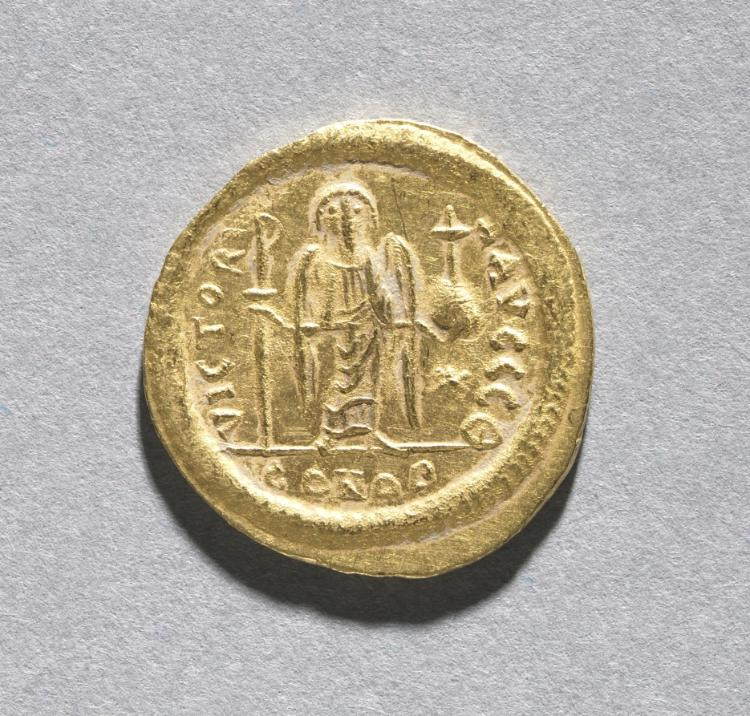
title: Solidus of Justinian I (reverse)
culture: Byzantium, Constantinople, Byzantine period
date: 545–565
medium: gold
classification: Coins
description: The vast number of surviving Byzantine coins attests to the level of trade across the empire. Controlled and supervised by the emperor, the producers of coins took care to represent his authority and reflect his stature. Talented artists were recruited to engrave the dies (molds) used for the striking of coins. Emperors increasingly came to include their heirs and co-emperors on their coinage, as well as other family members or even earlier rulers. Coins were recognized, then as now, as small, portable works of art. With their inscriptions and images, Byzantine coins provide valuable documentation of historical events and a record of the physical appearance of the emperors. The solidus is the basic gold coin of 24 karats; the tremissis, a gold coin of one-third the weight and value of the solidus; and the nomisma, which in the 10th century replaced the solidus as the standard gold coin.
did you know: This side of the coin shows the image of an angel holding a jeweled cross and orb.